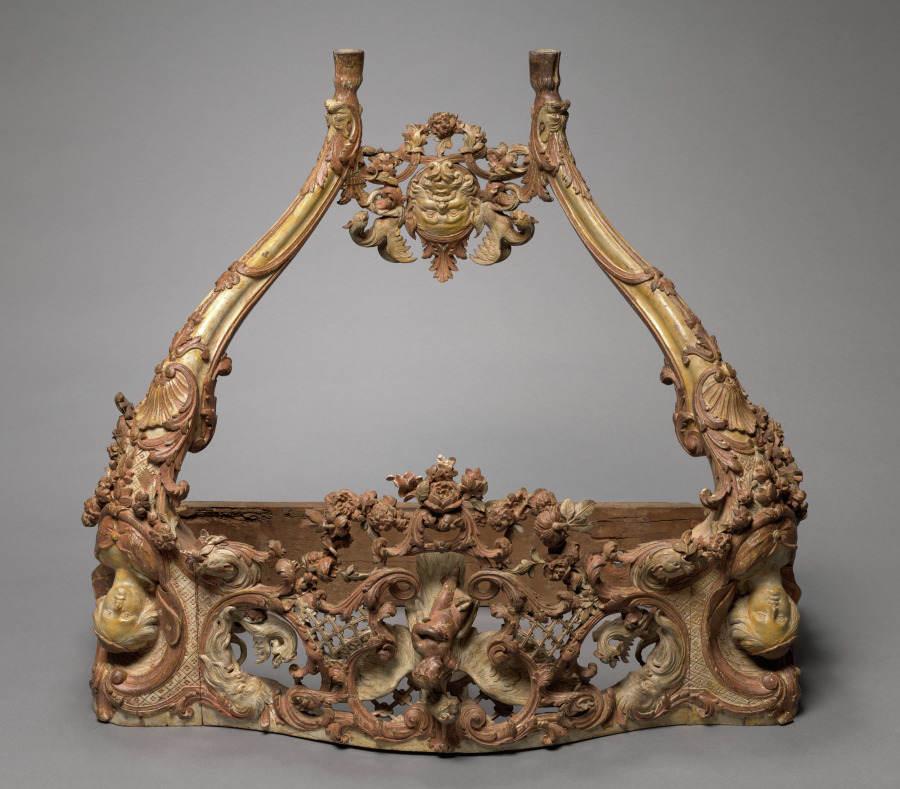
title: Console Table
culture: France, 18th century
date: c. 1720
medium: carved and painted wood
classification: Furniture and woodwork